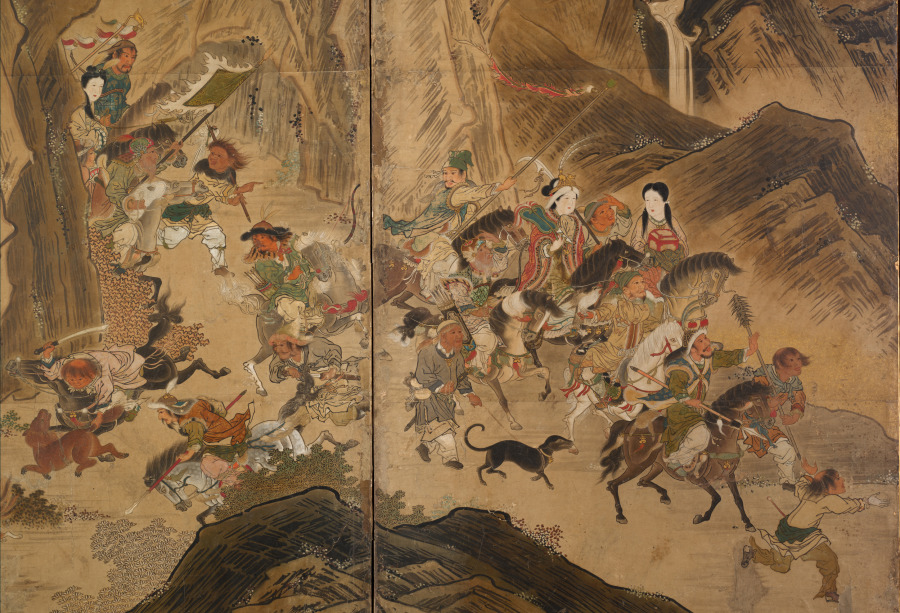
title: Tartars Hunting in a Mountain Landscape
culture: Japan, Edo period (1615–1868)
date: first half of 1600s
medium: six-panel folding screen; ink, color, and gold on paper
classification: Painting